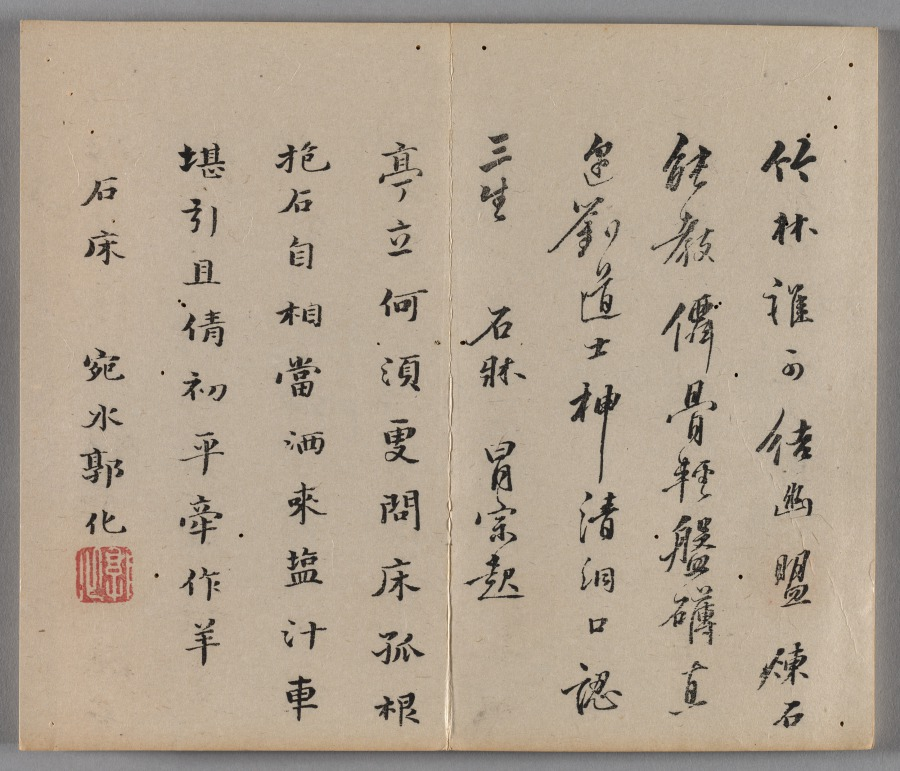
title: Ten Bamboo Studio Painting and Calligraphy Handbook (Shizhuzhai shuhua pu): Bamboo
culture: China, Qing dynasty (1644-1911)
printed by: Hu Zhengyan (Chinese, c. 1584–1674)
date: 1633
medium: Woodblock-printed book; ink and colors on paper; first edition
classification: Print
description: Color printing reached a level of perfection in the early 1600s, as seen in this Ten Bamboo Studio Collection of Calligraphy and Painting and the Mustard Seed Garden Manual of Painting (printed 1679 and 1701). The painterly quality, precision in registering (aligning) the woodblocks, and harmonious colors made them the most successful color print editions in Chinese history. Both editions were printed and compiled in Nanjing, spread nationwide, and had a great impact on the arts in Japan and Korea.